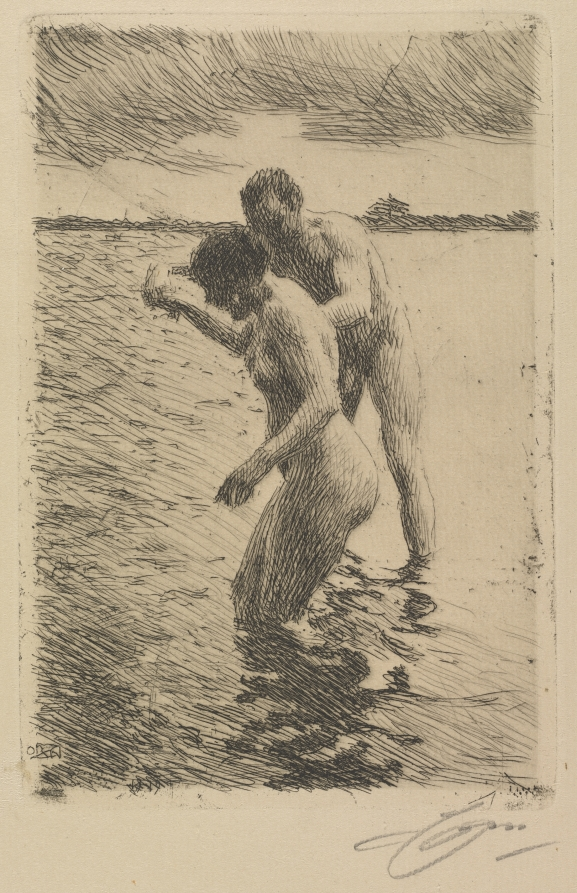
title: Pilot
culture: Sweden, 20th century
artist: Anders Zorn (Swedish, 1860–1920)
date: 1919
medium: etching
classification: Print